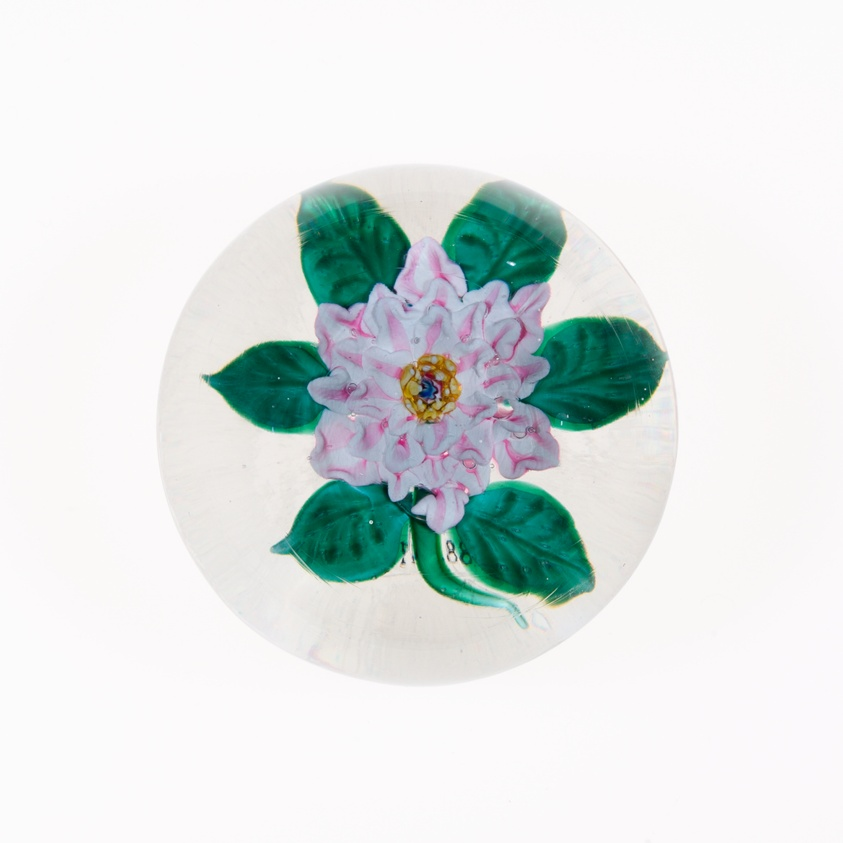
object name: Glass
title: Paperweight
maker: Mount Washington Glass Co.; American, 1837-1900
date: Late 19th century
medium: Glass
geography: United States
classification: paperweight; glass